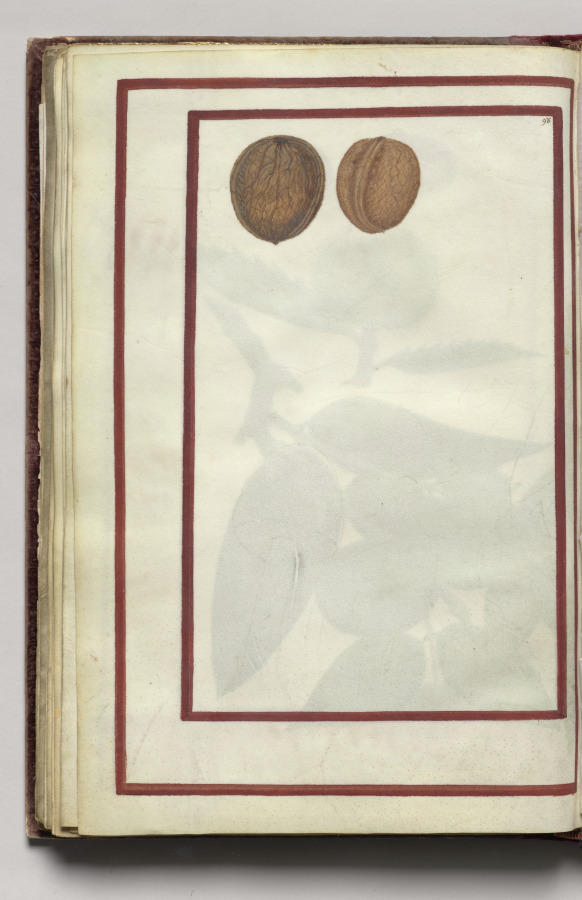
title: English Walnuts, folio 43 (verso), from Florilegium (A Book of Flower Studies)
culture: France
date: 1608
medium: watercolor, ink, silver, and gold over occasional traces of pencil, on vellum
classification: Bound Volume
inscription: Dated: Poitiers 1608 (on frontispiece) Signed: On frontispiece in black ink, lower right: Van Kuyk Notation on drawing: Frontispiece: in pencil, lower margin: * élève de Van Kessel, peintre flammand (* in pencil also appears in front of Van Kuyk's name).